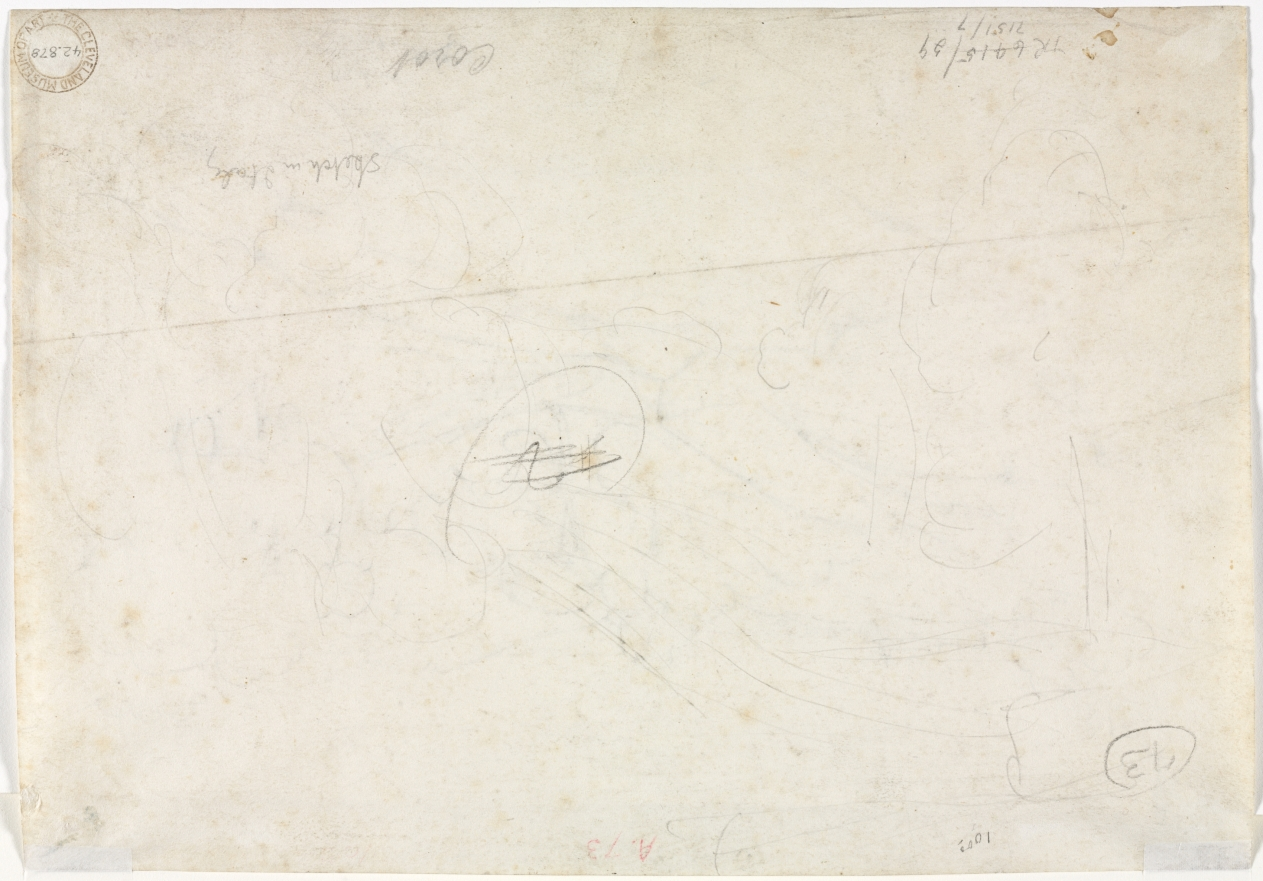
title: Sketch for a Landscape (verso)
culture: France, 19th century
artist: Jean Baptiste Camille Corot (French, 1796–1875)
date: 1827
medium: graphite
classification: Drawing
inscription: upper left, in graphite: 73 [circled] ; upper left, in graphite: 10ºº ; upper center, in red pencil: A. 13 ; center, in graphite: #2 [circled and crossed out three times] ; lower right, in graphite: sketch in Italy ; lower right, in graphite: Corot